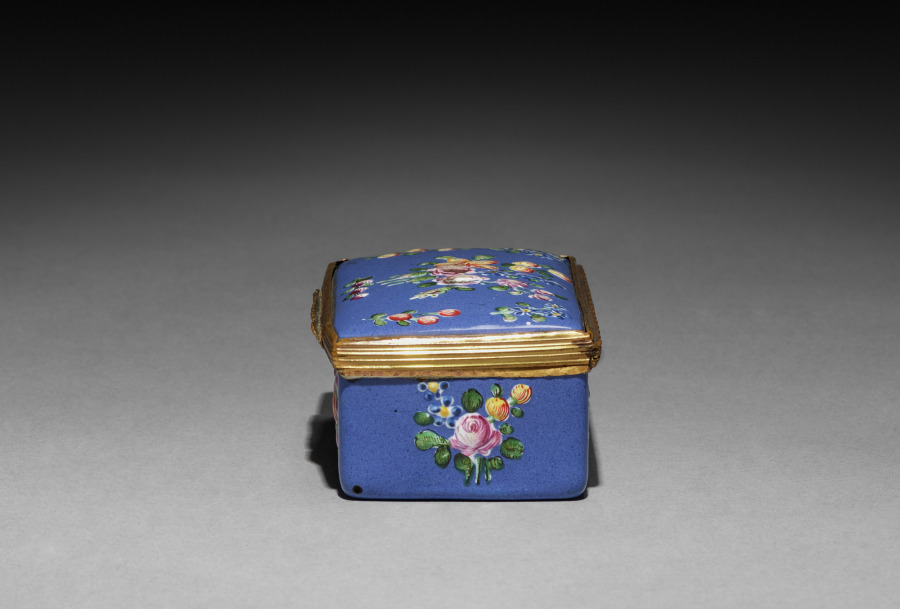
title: Snuff Box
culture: Germany ?, 19th century (?)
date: 1800s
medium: enamel on copper with metal mounts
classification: Miscellaneous